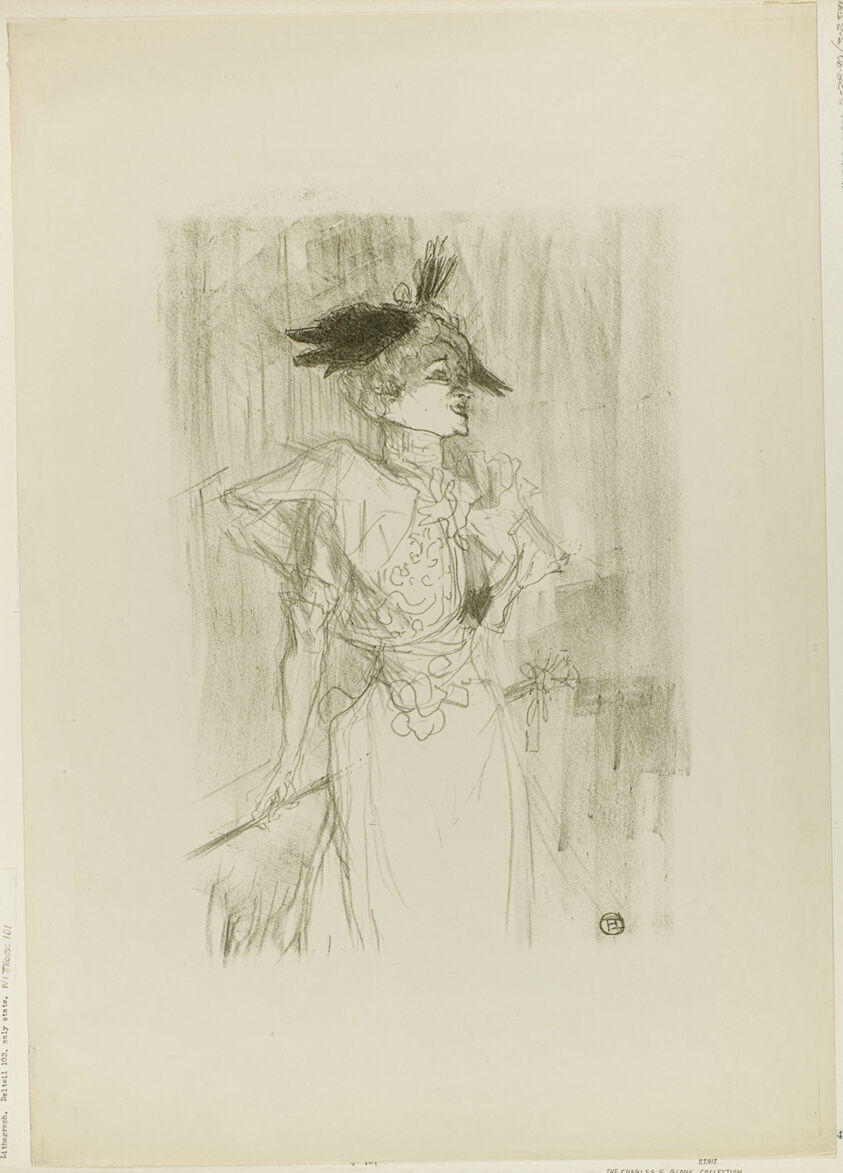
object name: Print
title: Mademoiselle Marcelle Lender, Standing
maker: Henri de Toulouse-Lautrec (French, 1864-1901)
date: 1895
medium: Color lithograph on cream wove paper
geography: France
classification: lithograph; print; prints and drawing